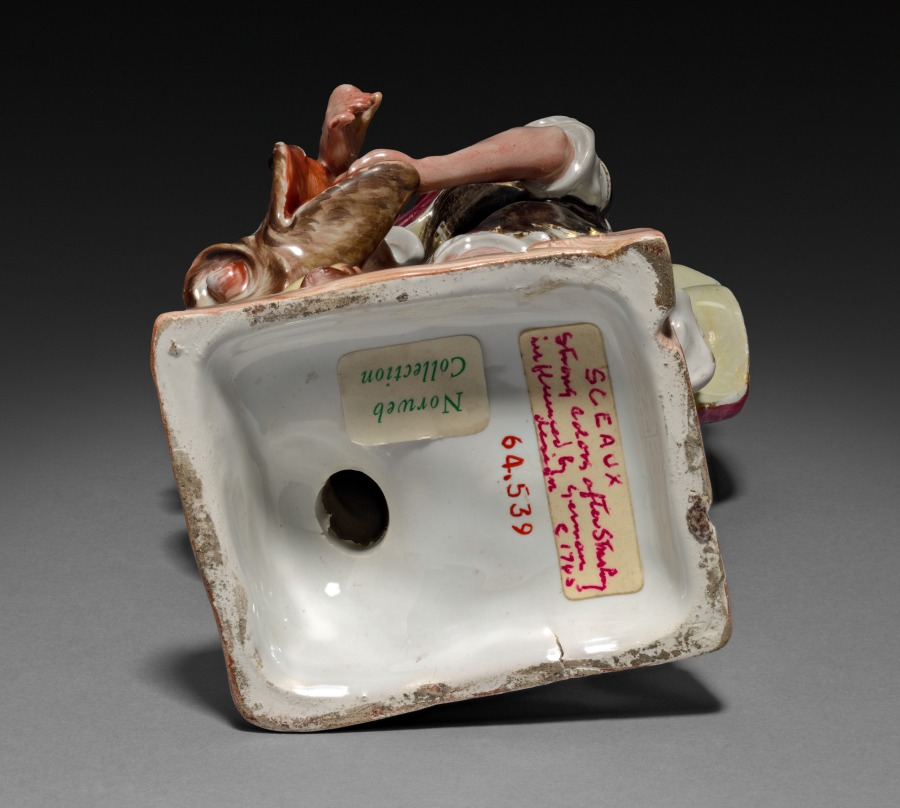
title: Classical Warrior with Serpent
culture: France, 18th century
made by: Sceaux Factory (French, active 1748–66)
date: c. 1770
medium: faience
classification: Ceramic